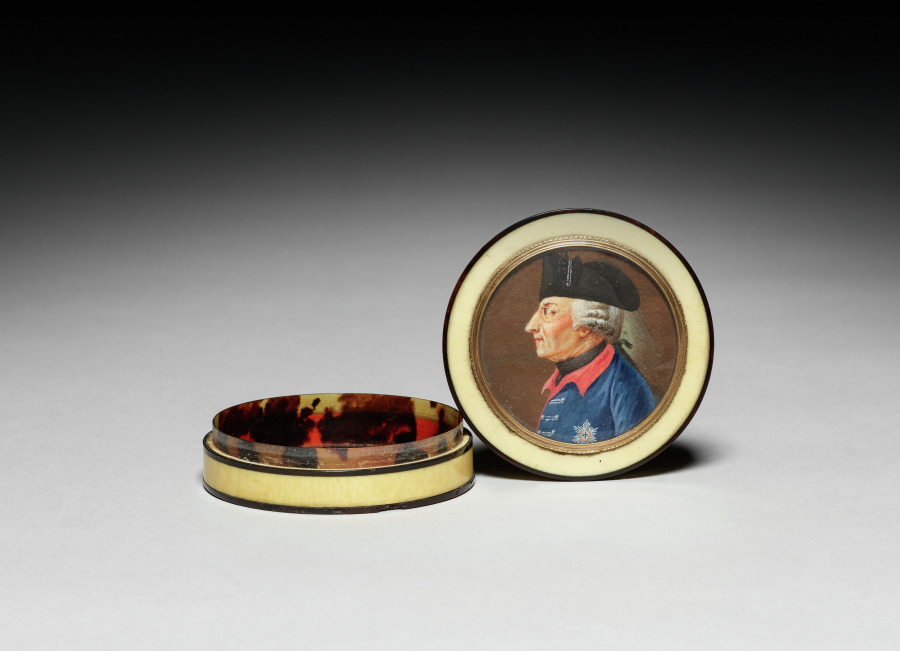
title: Snuff Box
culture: Germany, 18th century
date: c. 1770–1775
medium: tortoiseshell and ivory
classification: Miscellaneous